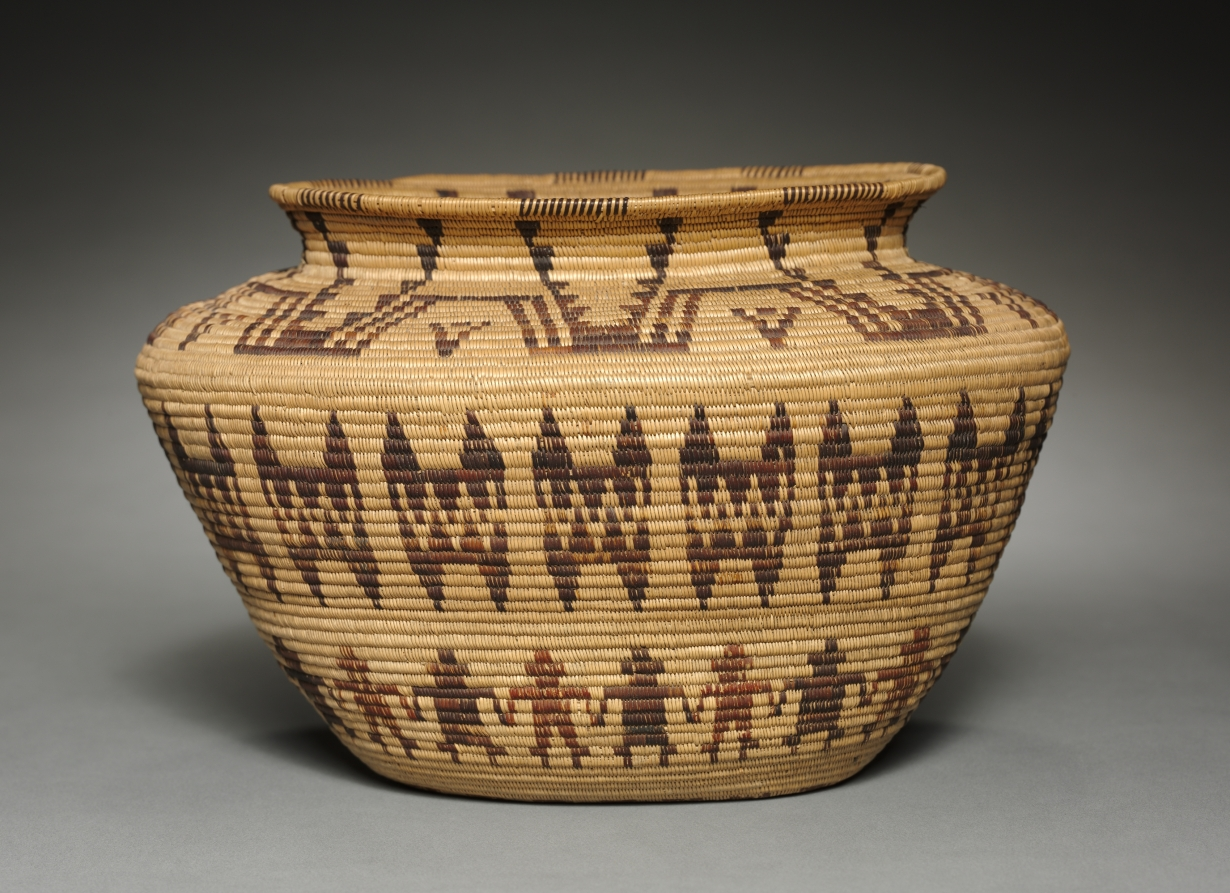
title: Jar-shaped Basket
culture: Native North America, Great Basin, California, Death Valley, Timbisha (Panamint) Shoshone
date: c. 1900–1910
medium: willow, bulrush, yucca root; coiled (3 rods)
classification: Basketry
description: The figures woven in the lower register of this basket were borrowed from basketry of the Yokuts, a California group that lived to the west of Timbisha (Panamint) Shoshone territory.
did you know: The figures woven in the lower register of this basket were borrowed from basketry of the Yokuts.